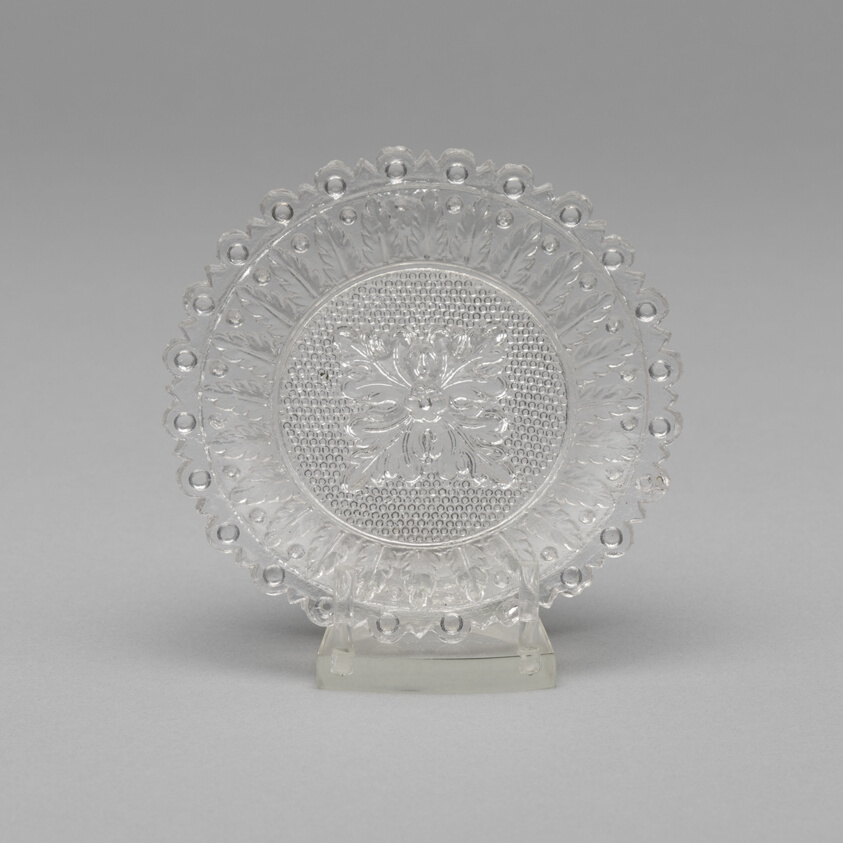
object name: Glass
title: Cup plate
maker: Artist unknown (American, 19th century); Probably Pittsburgh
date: c. 1830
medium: Pressed glass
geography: Pittsburgh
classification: plate (general, dish); glass; american decorative arts; american arts; decorative arts